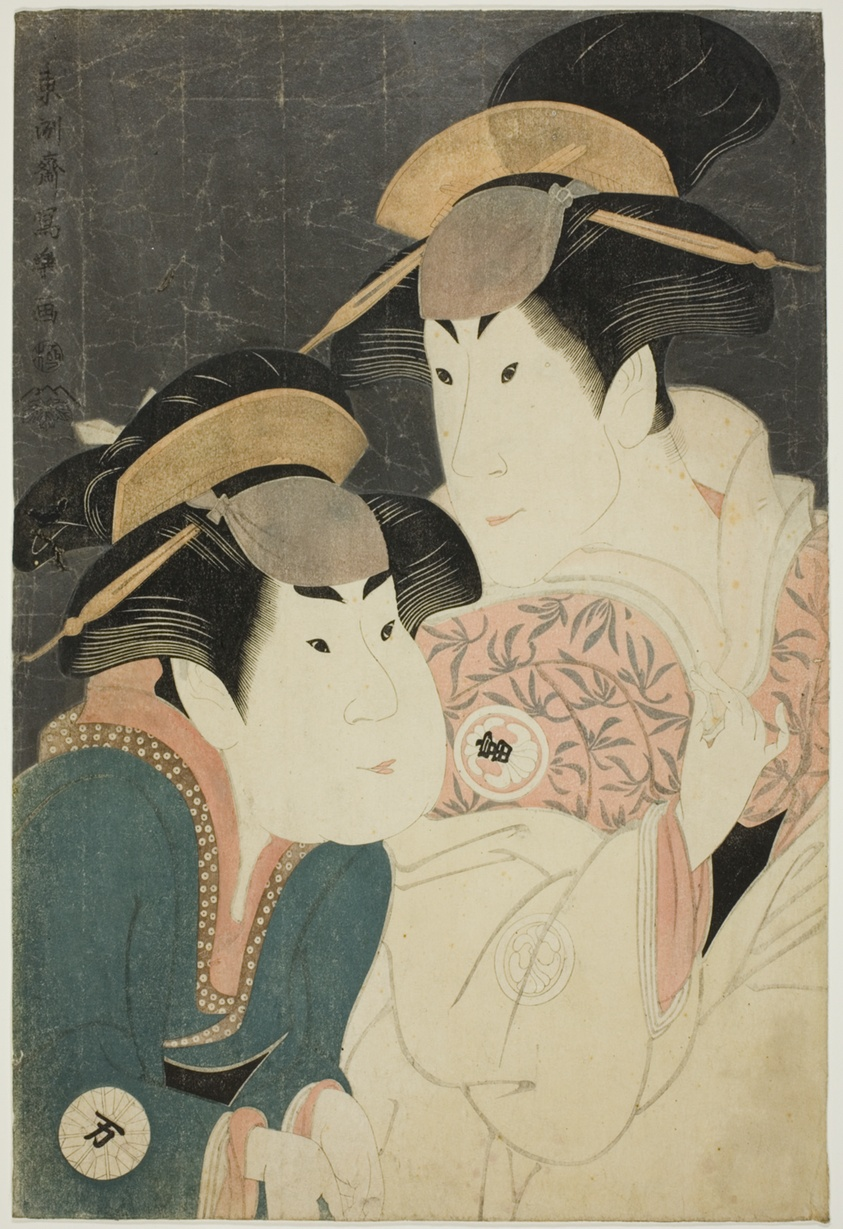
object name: Print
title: The actors Segawa Tomisaburo II (R) as Yadorigi, wife of Ogishi Kurando, and Nakamura Manyo (L) as the servant Wakakusa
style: Japanese (culture or style)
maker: Toshusai Sharaku 東洲斎 写楽; Japanese, active 1794-95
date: 1794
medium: Color woodblock print; oban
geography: Japan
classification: woodblock print; print; asian art